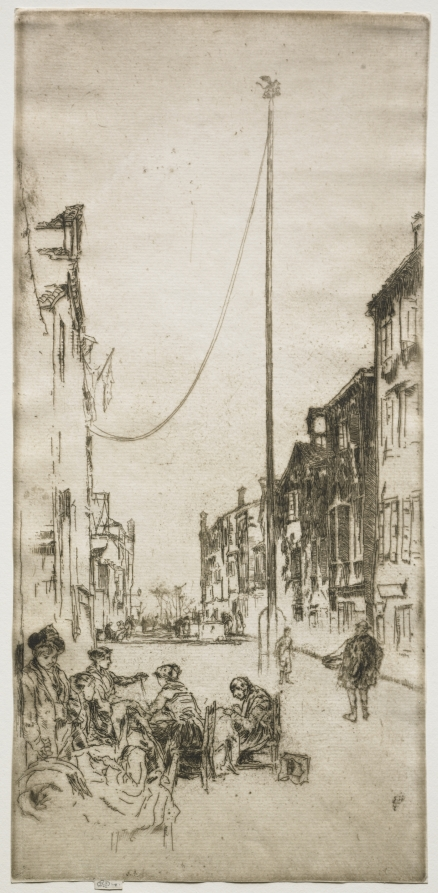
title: The Mast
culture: America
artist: James McNeill Whistler (American, 1834–1903)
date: 1880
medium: etching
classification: Print